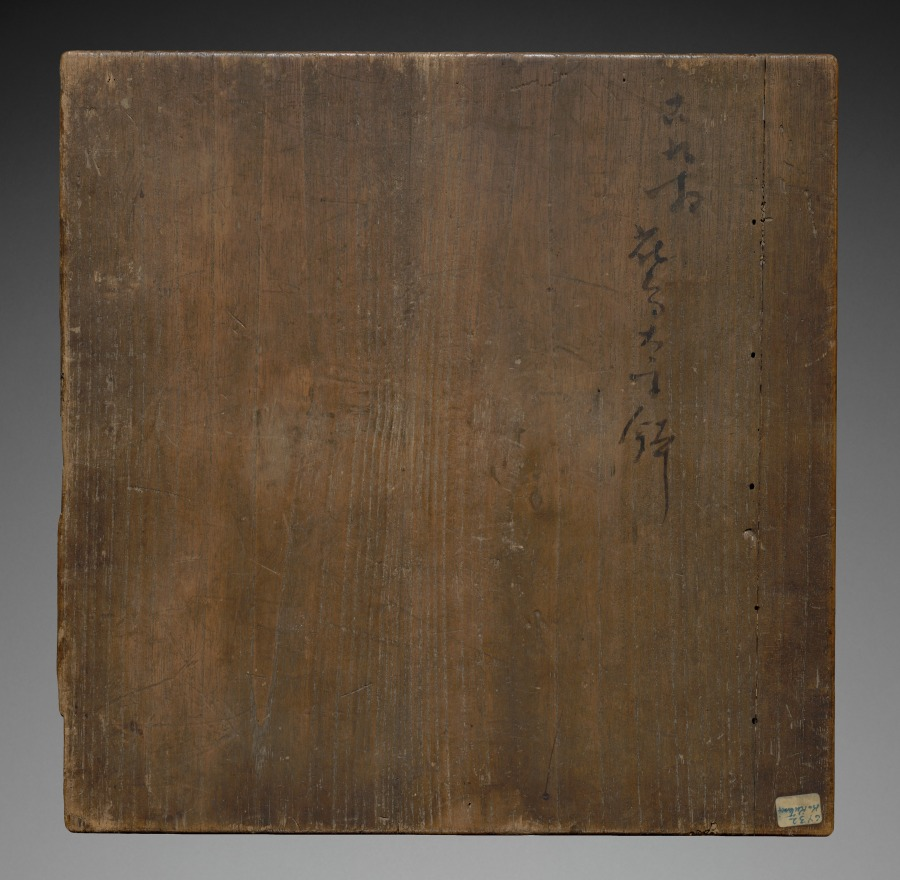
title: Plate with Bird and Flower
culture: Japan, Edo period (1615–1868)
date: mid- to late 1600s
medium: Porcelain with overglaze enamel (Hizen ware, Ko-Kutani style)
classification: Ceramic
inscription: "FUKU" in square seal under aubergine glaze.